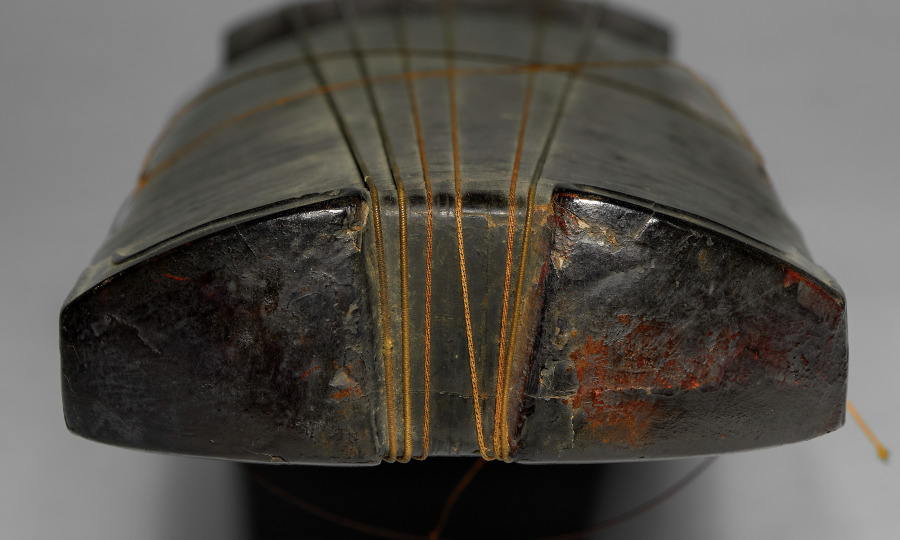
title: Guqin made by Zhang Ruixiu of Suzhou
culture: China, Ming dynasty (1368–1644)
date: 1584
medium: Seven-string Asian long zither, chordophone, made from wood, lacquer, mother of pearl, and silk strings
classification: Musical Instrument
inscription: 為海虞天池先生重斲/ 萬曆甲申古吳張睿脩得古桐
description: China’s most prestigious instrument, the guqin can be traced to the Chu culture almost 2500 years ago. By the late Ming dynasty, Jiangnan was a center of high-end guqin production. Coated in black lacquer, this elegantly crafted instrument is inscribed on the inside, stating it was made by Zhang Ruixiu of Suzhou for Mr. Tianchi of Haiyu, also known as Yan Cheng (1547–1625). Yan was a key figure in guqin music history and founder of the Yushan school in Suzhou. Zhang Ruixiu was a guqin maker, known for achieving a supreme tone quality. Ten instruments attributed to him are known, of which this guqin has the earliest date.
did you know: The 13 studs in mother-of-pearl inlay indicate finger positions for sounding harmonics.